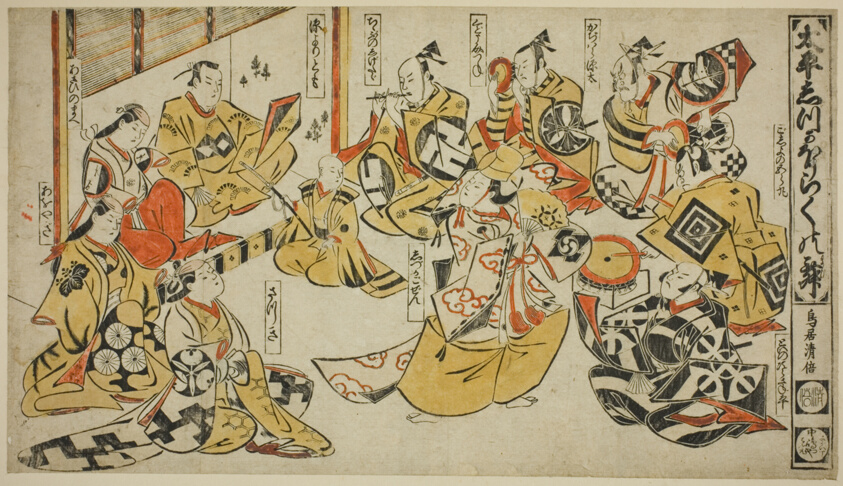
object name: Print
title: Scene from the Drama "Lyric Dance of Shizuka Gozen (Taihei Shizuka Horaku no mai)"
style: Japanese (culture or style)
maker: Torii Kiyomasu I (Japanese, active c. 1704–18 (?))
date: c. 1711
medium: Hand-colored woodblock print; horizontal o-oban, tan-e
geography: Japan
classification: woodblock print; print; asian art